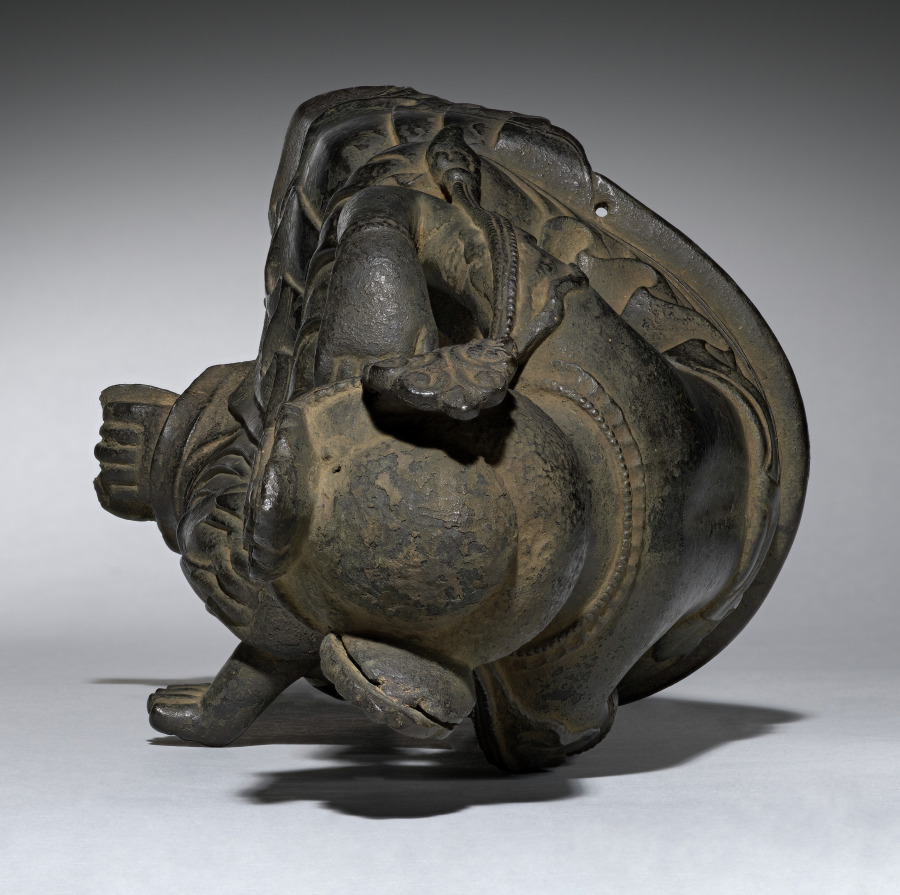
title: Buddha of the Future (Miroku Bosatsu)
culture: Japan, Asuka period (538–710)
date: late 600s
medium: cast bronze, incised, with traces of gilding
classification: Sculpture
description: Buddhism was introduced to Japan in the sixth century. For early Japanese devotees, Buddhism offered the promise of salvation through faith in the Buddha of the Future, who would appear at the end of the world. The concept of eternal salvation held particular resonance with the Japanese aristocracy, who became the staunchest supporters of this new faith. Small sculptures like this one, with its gentle grace and powerful presence, were popular devotional objects.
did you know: The Sanskrit name of this being, Maitreya, derives from the Sanskrit word for friend, mita.